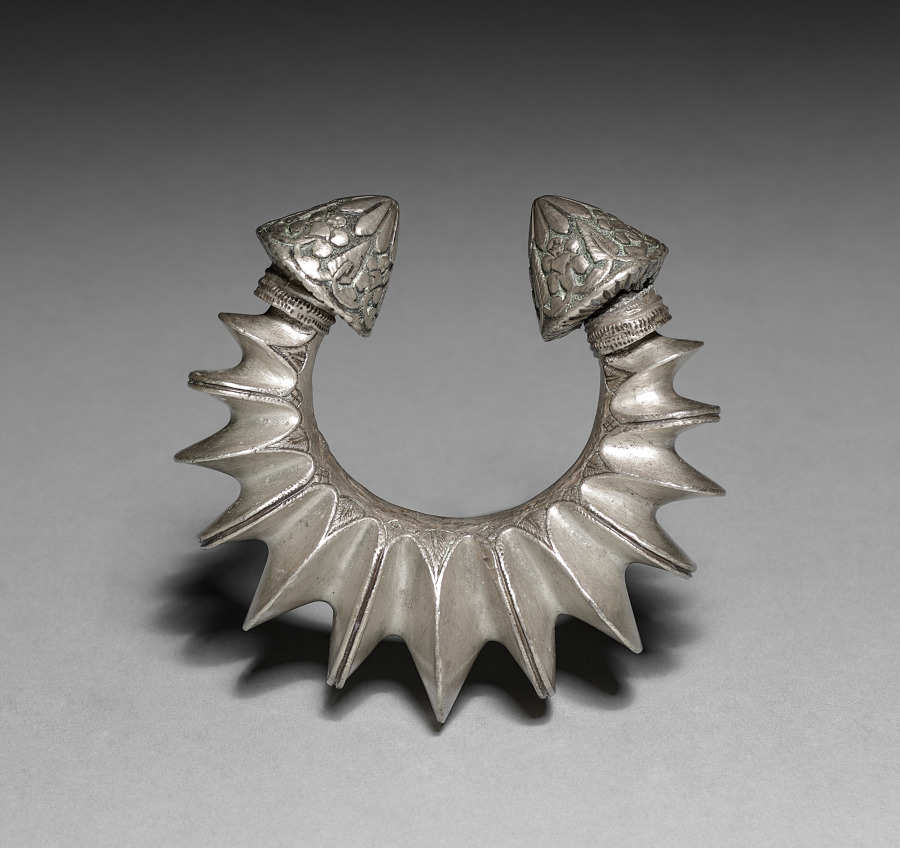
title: Bracelet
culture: India, Punjab (?) or Sind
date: 1800s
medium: silver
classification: Jewelry